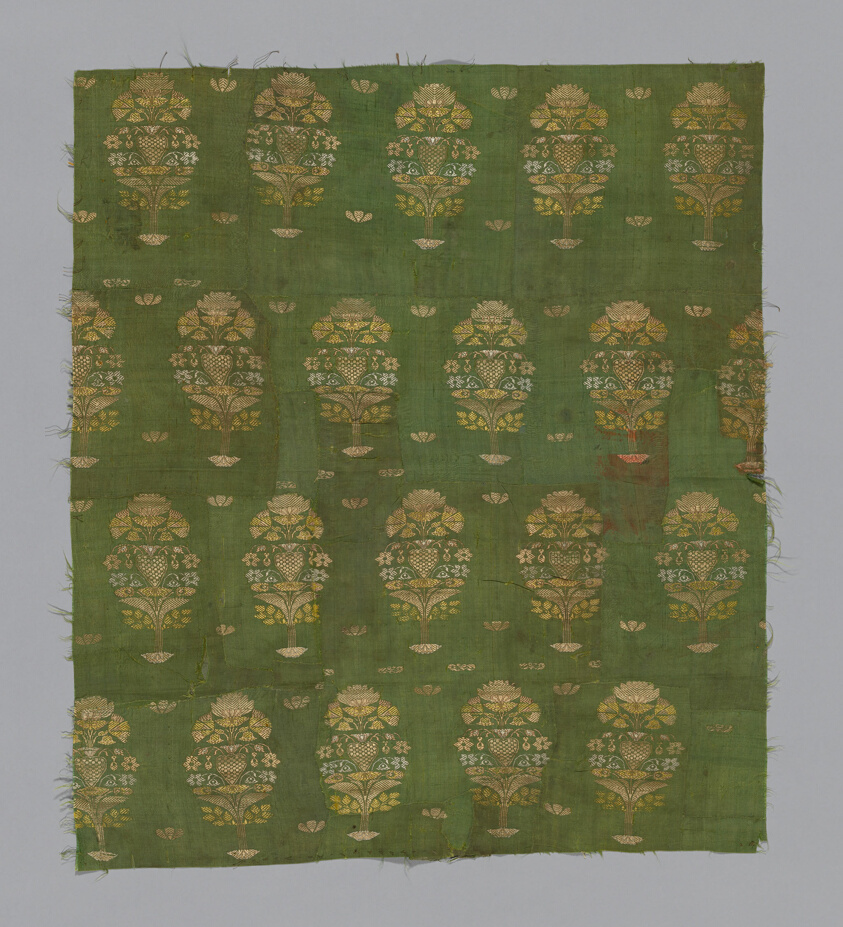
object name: Textile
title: Fragment (Dress Fabric)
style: isfahan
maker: Iran (Persia, Isfahan)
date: 1675/1725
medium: Ispahan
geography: Iran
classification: textile; weaving